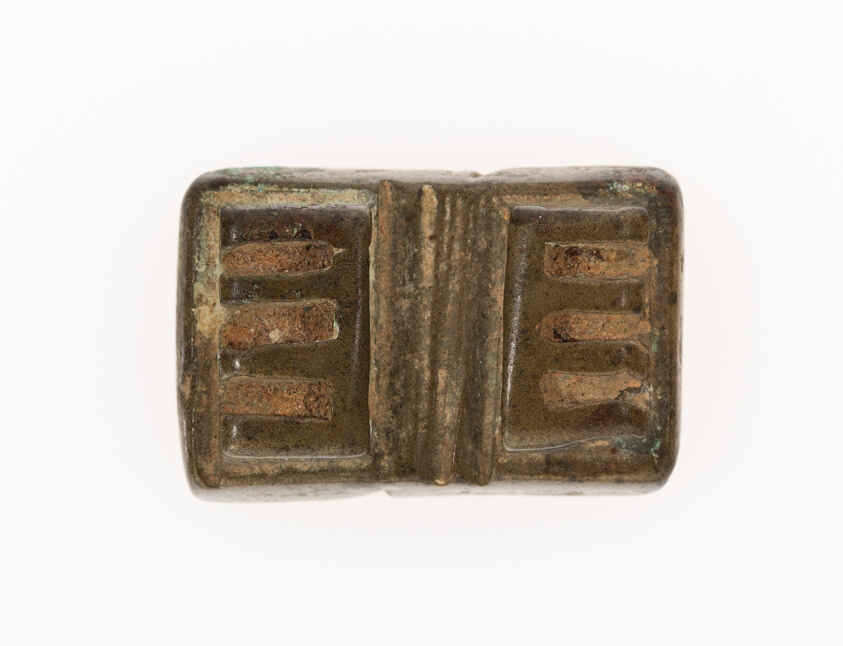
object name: Decorative Arts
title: Goldweight with a Geometric Design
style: asante, Arts of Africa, akan, african Art, Coastal West Africa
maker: Asante or related Akan-speaking peoples; Ghana; Coastal West Africa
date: 18th/19th century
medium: Copper alloy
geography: Ghana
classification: gold-weight; metal; arts of Africa; measure; african art; decorative arts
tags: geometric motif